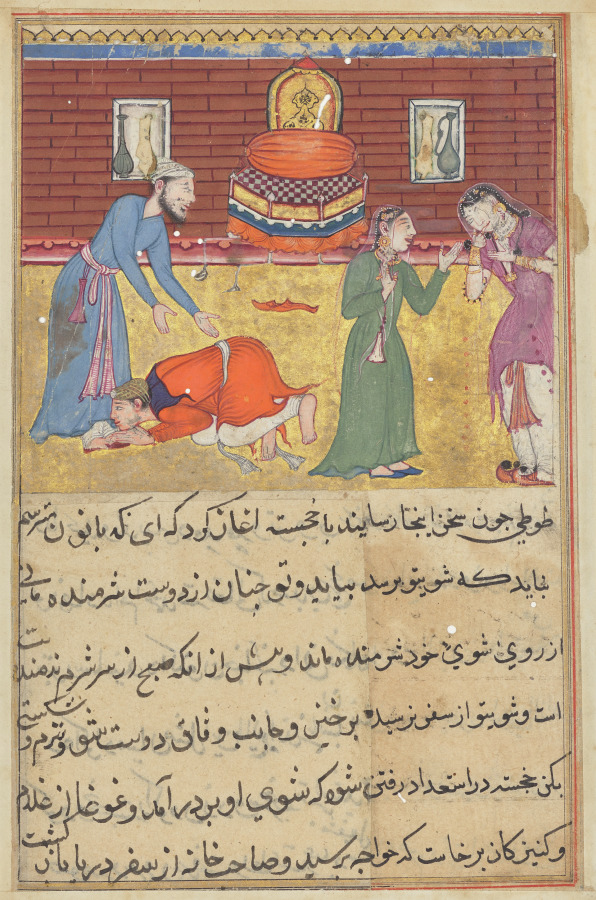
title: The pious man’s son, now a king, reveals himself to his father; his nurse upbraids his unfaithful mother, from a Tuti-nama (Tales of a Parrot): Fifty-second Night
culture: Mughal India, court of Akbar (reigned 1556–1605)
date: c. 1560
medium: gum tempera, ink, and gold on paper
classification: Painting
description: The young man throws himself at his overjoyed father’s feet. As a boy, he was nearly killed by his treacherous mother, who hoped to please her lover. The nurse, learning of her plan, took the child and fled to safety. In the intervening years, he killed a dragon, married a princess, and became a king. The king’s success is attributed to a magical, seven-colored bird’s head, which he ate as a child.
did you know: A corrosive pigment used on two of the vessels in the back wall has eaten through the paper.